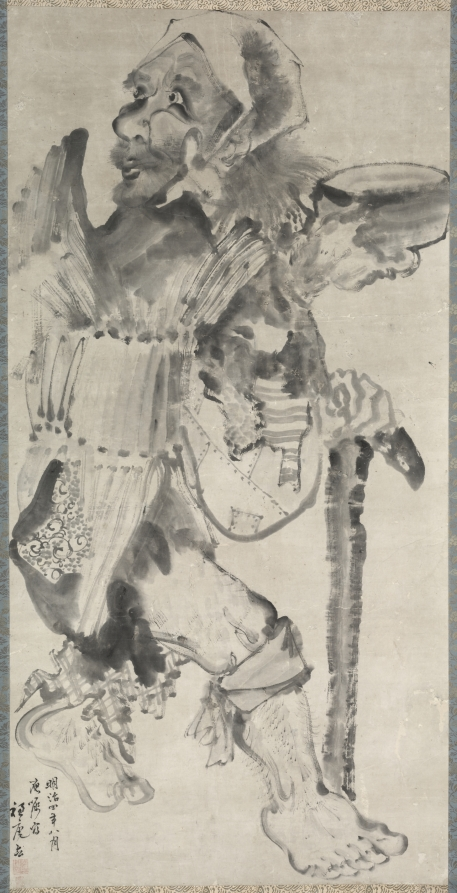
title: Beggar (Kojiki)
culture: Japan, Meiji period (1868–1912)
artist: Hirafuku Suian (Japanese, 1844–1890)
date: 1871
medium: hanging scroll; ink on paper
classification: Painting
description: The Japanese term for beggar, kojiki, derives from the word kotsujiki, which refers to Buddhist monks taking bowls from door to door to request sustenance. The son of the artist Suian Bunrō, Suian Hirafuku was born in Kakunodate in Japan’s northern Akita prefecture. When he was 16, he went to study in Kyoto. In 1880 he took first place with another painting titled Beggar at the third Akita Prefectural Industrial Exposition, and in 1890, he took second prize for technical achievement with Nursing Tigress at the third National Industrial Exposition.